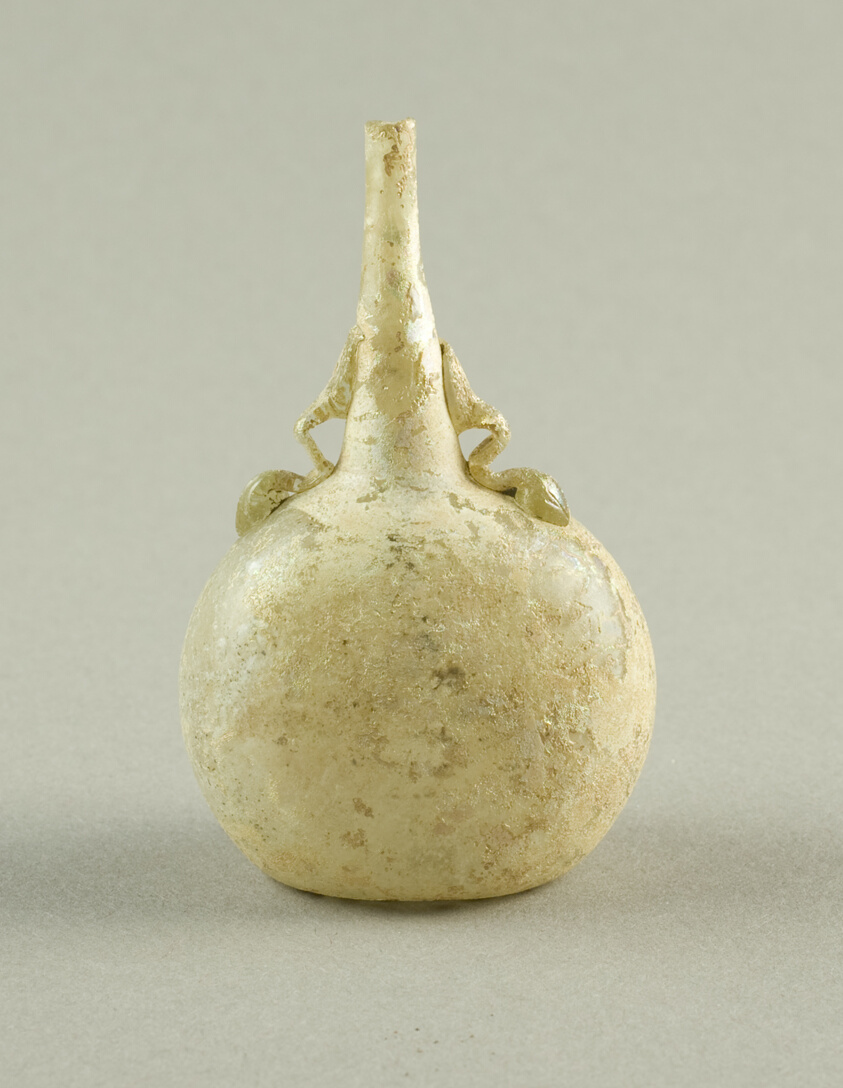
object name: Vessel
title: Flask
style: Islamic (culture or style)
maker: Islamic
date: 7th-13th century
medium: Glass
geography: Mediterranean Region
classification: glass; vessel; ancient art